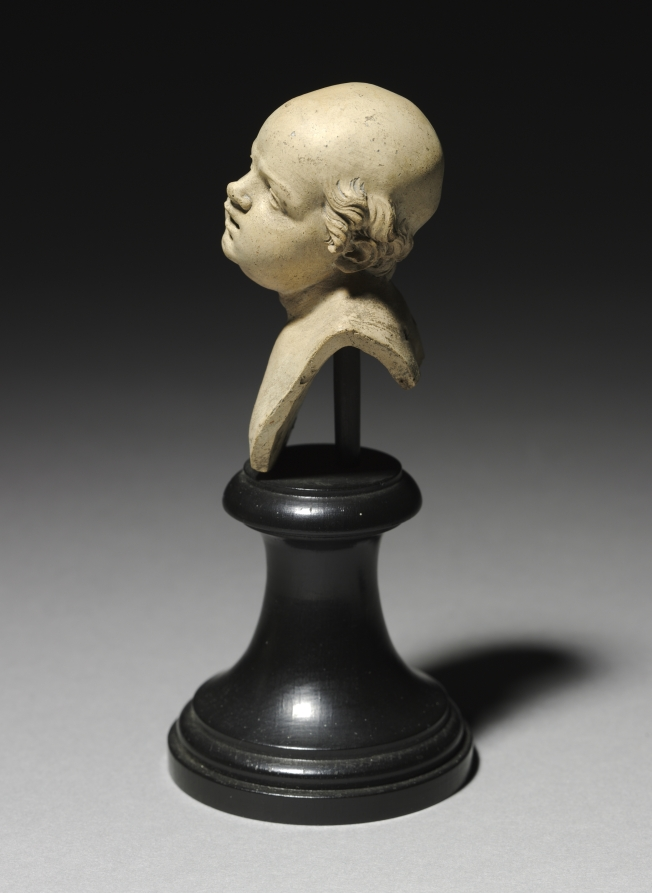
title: Head of a Man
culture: Italy, Naples(?), early 19th Century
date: c. 1800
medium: terracotta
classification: Sculpture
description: Each of these miniscule terracotta busts has allegedly been formed by hand, though the precision of the detailed features implies that they have been cast from a mold. Details such as the meticulously executed facial features and the thin, exact rows of hair on each figure suggest a manufactured method of creation. Furthermore, these figures lack any trace of fingerprints that handmade figures of this time typically bear. Small holes at the base of each bust suggest that the heads were once attached to bodies that may have been used as crèche figurines. The busts were created in Naples where large numbers of nativity scenes were produced around the turn of the nineteenth century. The similarity in size to archetypal terracotta crèche figurines as well as the vast production of nativities in Naples at this time suggest that these busts were created for a nativity scene.